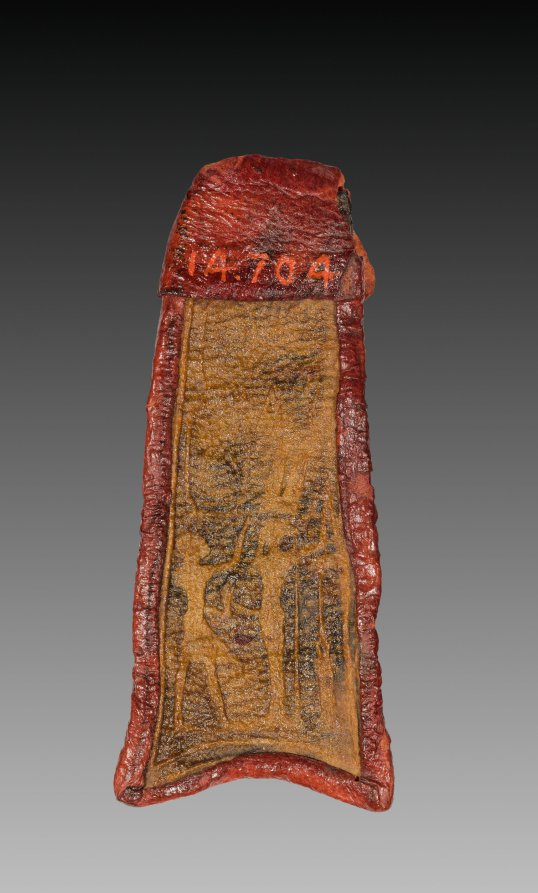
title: Tab from Mummy Band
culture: Egypt, Third Intermediate (1069–715 BCE), Dynasty 22, reign of Osorkon I (992–887 BCE)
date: 945–715 BCE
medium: stained leather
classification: Funerary Equipment